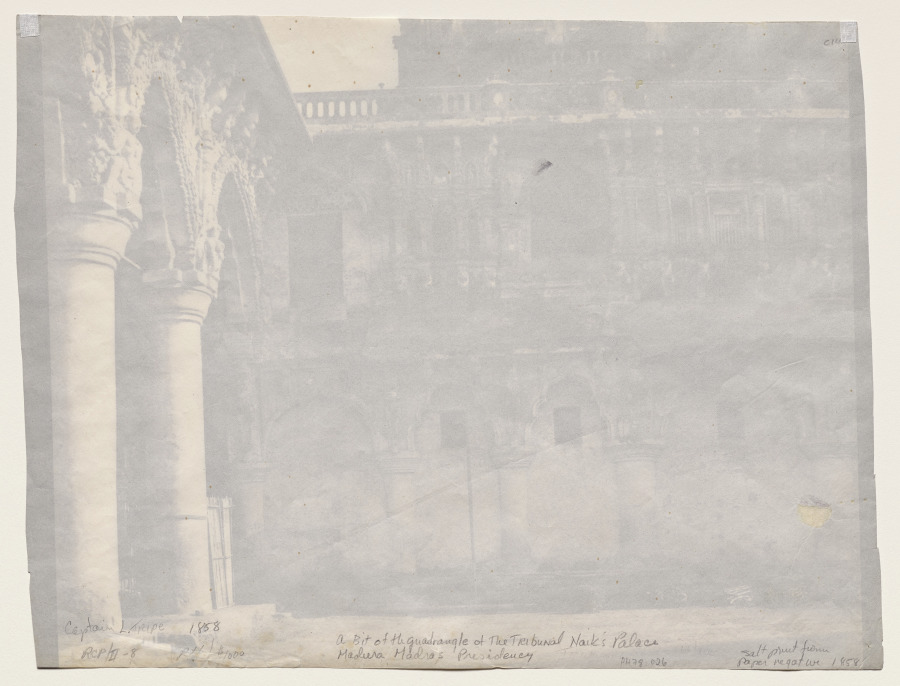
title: South Façade of the Quadrangle of the Nayak Darbar Hall, Thanjavur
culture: England, 19th century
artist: Captain Linnaeus Tripe (British, 1822–1902)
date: 1858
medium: albumenized salt print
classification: Photograph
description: Early box cameras had no shutter; the photographer just removed and replaced the lens cap, guessing at how long to leave it off. Linnaeus Tripe’s mastery of light and exposure here is incredible. The print allows us to read the decoration that is in shadow as well as that in full sunlight.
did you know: This assembly hall is an important example of the Islamic influences brought by the Nayaks to South Indian architecture in the 1600s.